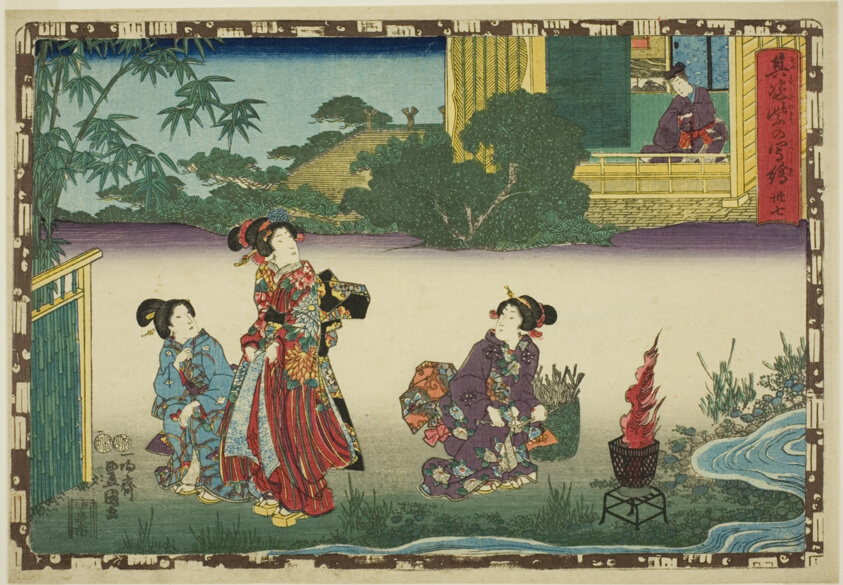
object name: Print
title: No. 37, from the series "That Purple Image in Magic Lantern Shows (Sono sugata yukari no utsushie)"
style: Japanese (culture or style)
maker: Utagawa Kunisada I (Toyokuni III) (Japanese, 1786-1864)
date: c. 1847/52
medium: Color woodblock print; oban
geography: Japan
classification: woodblock print; print; asian art